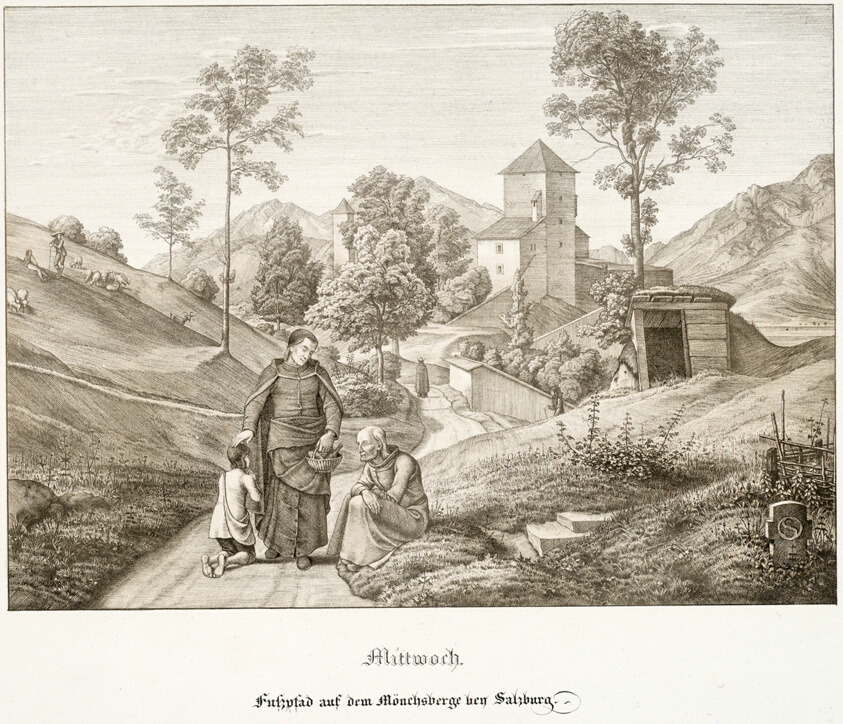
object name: Print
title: Wednesday: Footpath on the Mönchsberg Near Salzburg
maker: Ferdinand Olivier (German, 1785-1841)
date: 1823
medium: Lithograph with tint-stone on white wove paper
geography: Germany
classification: lithograph; print; prints and drawing